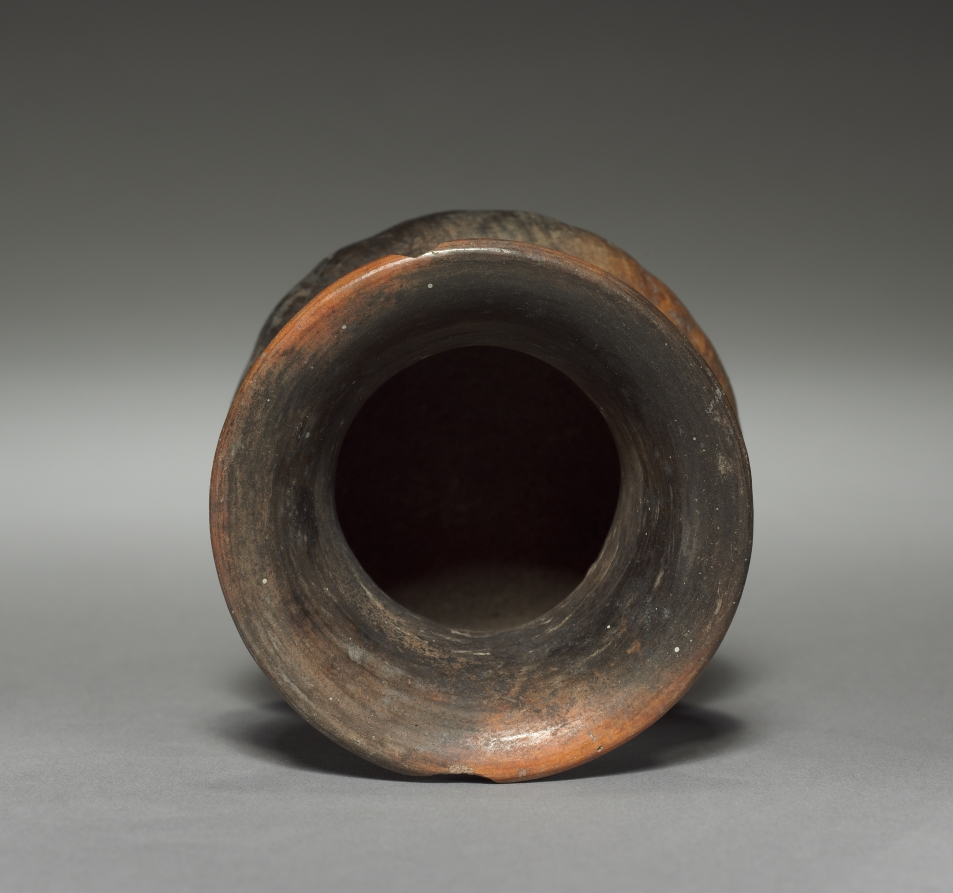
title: Vase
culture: Mexico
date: before 1521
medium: pottery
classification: Ceramic